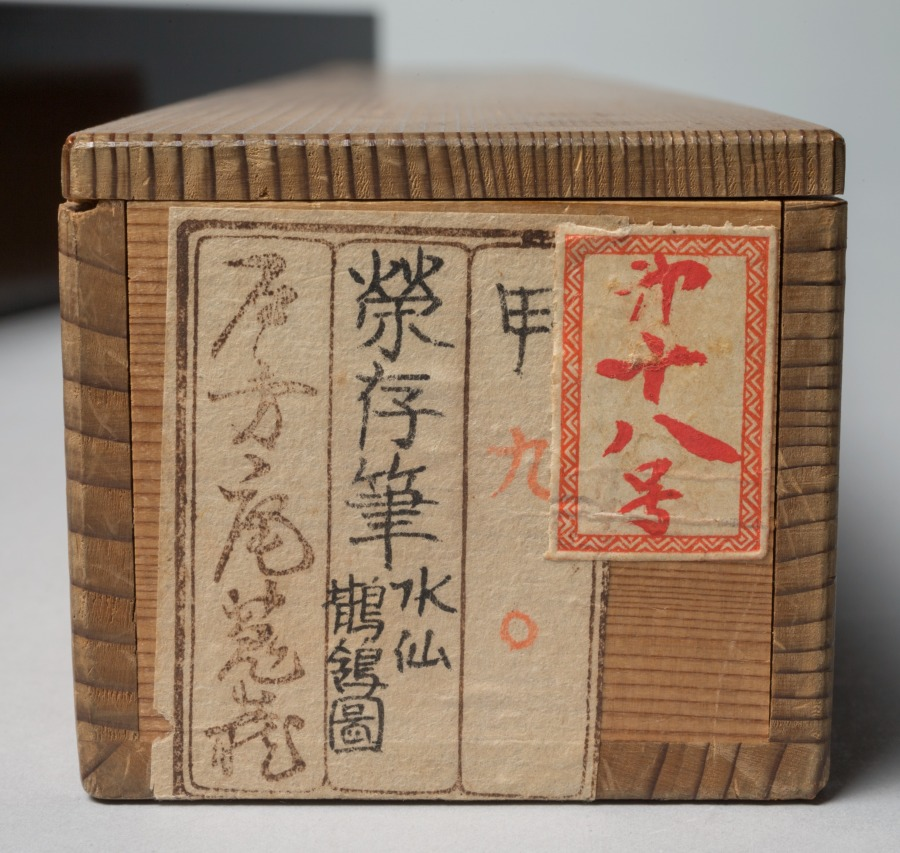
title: Wagtails and Narcissus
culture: Japan, Muromachi period (1392–1573)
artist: Eison (Japanese)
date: mid-1500s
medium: hanging scroll; ink on paper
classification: Painting